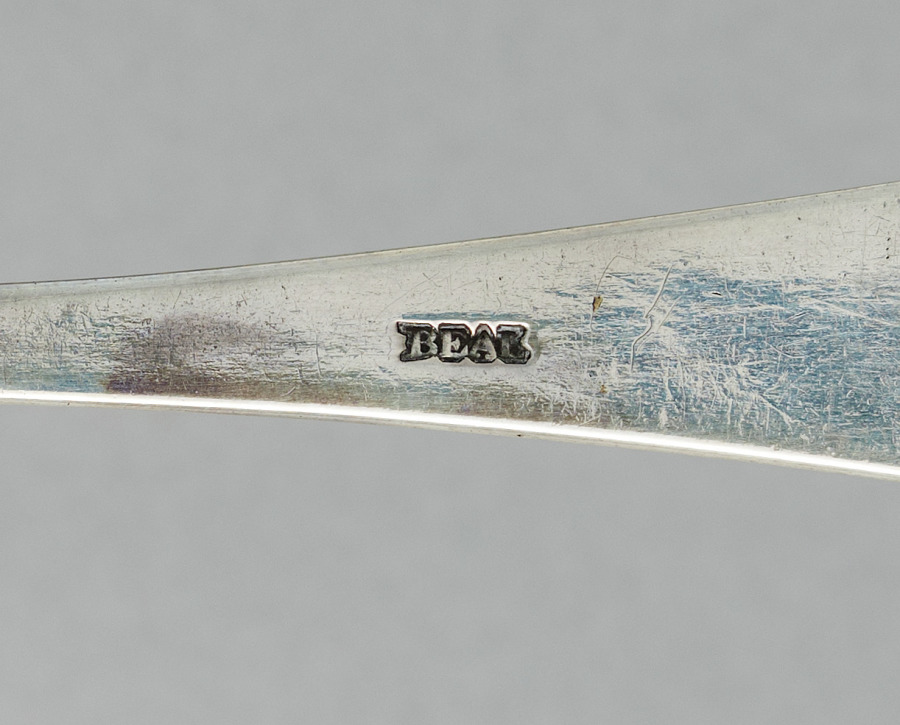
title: Spoon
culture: America, Massachusetts, 18th century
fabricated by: Caleb Beal (American, 1746–1801)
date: c. 1790–1800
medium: silver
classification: Silver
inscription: "HAB" in script within reserve on top at handle end. (Initials of the original owner have not been identified.)